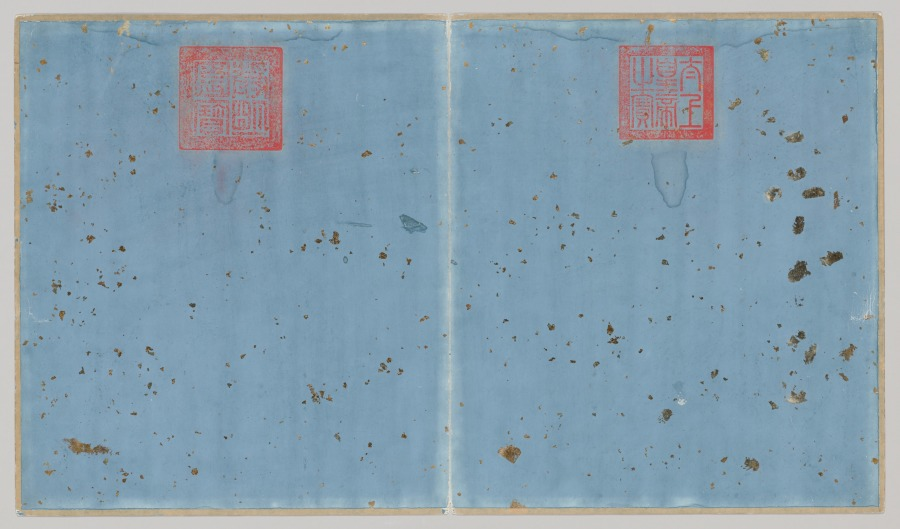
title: Battle Scenes of the Quelling of Rebellions in the Western Regions, with Imperial Poems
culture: China, Qing dynasty (1644–1911), Qianlong reign (1736–95)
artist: Giuseppe Castiglione (Italian, 1688–1766)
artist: Jean Damascene Sallusti (Italian, d. 1781)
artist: Jean Denis Attiret (French, 1702–1768)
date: c. 1765–74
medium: Etchings, mounted in album form, 16 leaves plus two additional leaves of inscriptions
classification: Print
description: This set of etchings was commissioned by Emperor Qianlong to record in pictorial terms the courage of his generals and soldiers in quelling the rebellions in the Western Regions. Qianlong added his own poem to each of the etchings, indicating his appreciation and pride in this demonstration of military might. "Western Regions" refers to the present-day Xingjiang province, often described in Western writing as "Central Asia."